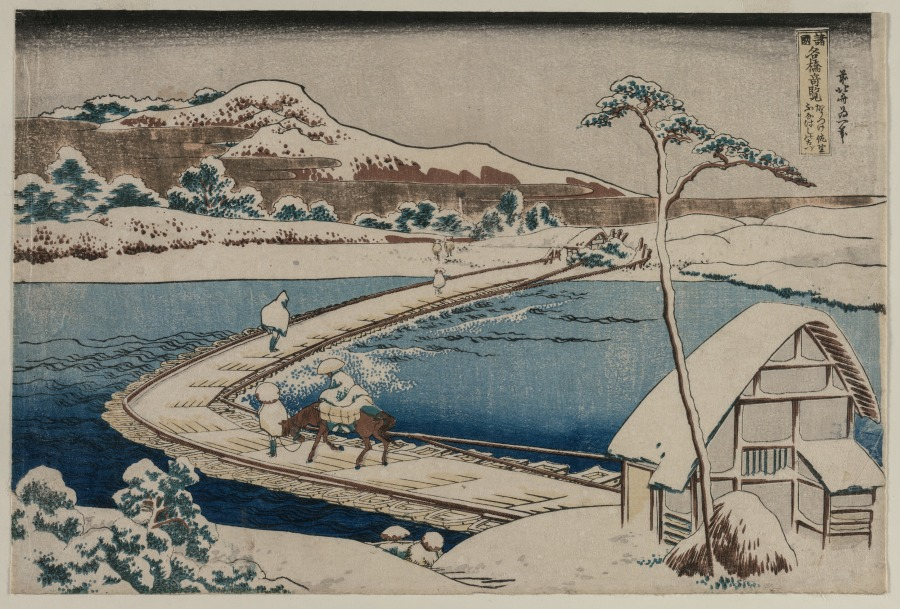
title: An Ancient Picture of the Boat Bridge at Sano in Kozuke Province from the series Curious Views of Famous Bridges in the Provinces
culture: Japan, Edo period (1615–1868)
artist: Katsushika Hokusai (Japanese, 1760–1849)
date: early 1830s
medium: color woodblock print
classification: Print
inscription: Signature: Zen Hokusai Iitsu hitsu Censorship Seal: kiwame